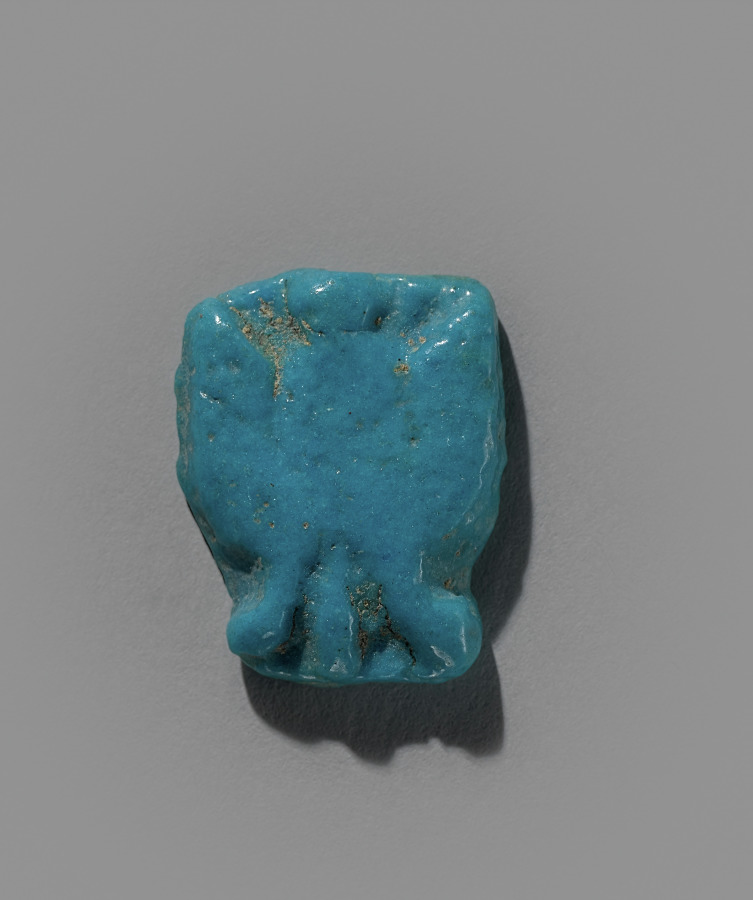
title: Food Model Amulet: Brace of Duck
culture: Egypt, New Kingdom (1540–1069 BCE), Dynasties 19–20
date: 1295–1069 BCE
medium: turquoise faience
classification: Amulets